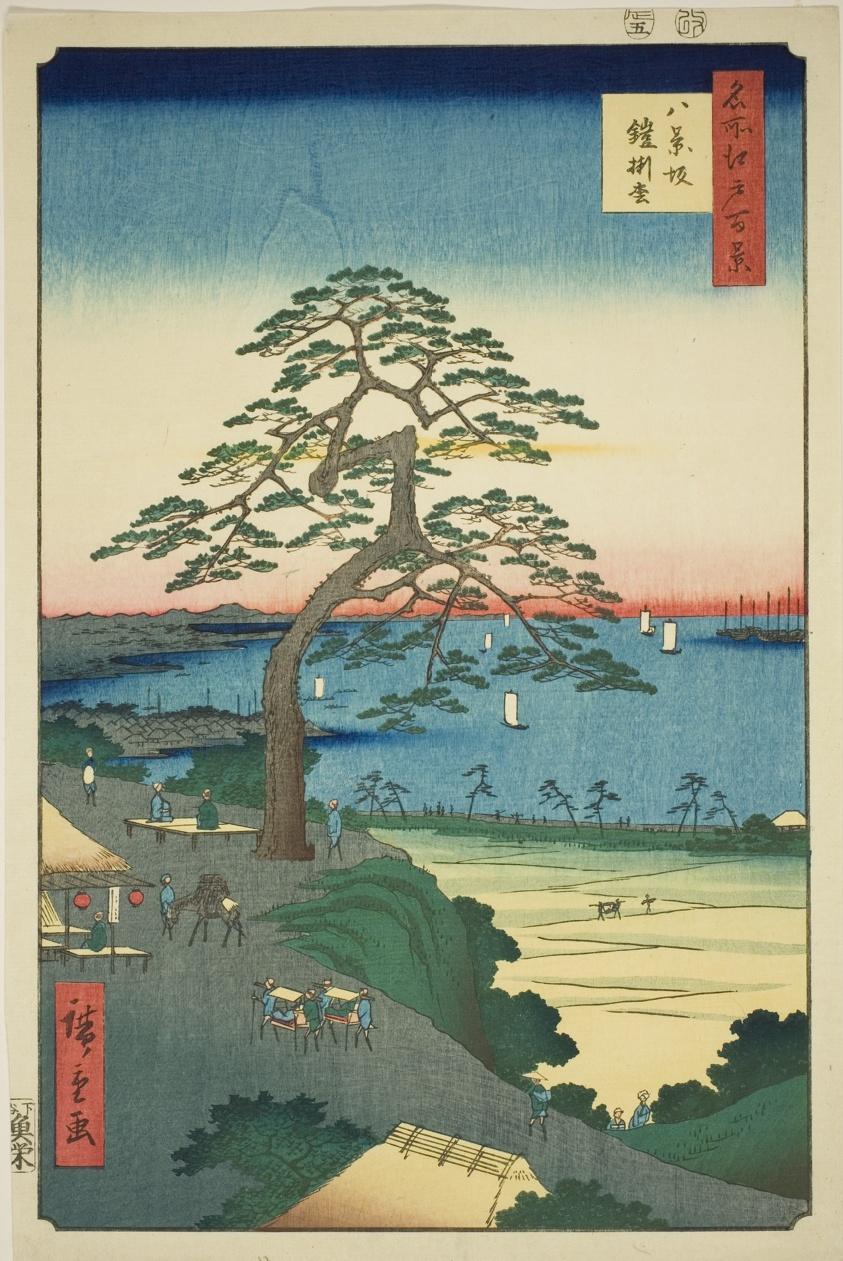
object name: Print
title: The Armor-hanging Pine at Hakkeizaka (Hakkeizaka Yoroikakematsu), from the series "One Hundred Famous Views of Edo (Meisho Edo hyakkei)"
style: Japanese (culture or style)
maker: Utagawa Hiroshige 歌川 広重; Japanese, 1797-1858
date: 1856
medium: Color woodblock print; oban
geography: Japan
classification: woodblock print; print; asian art